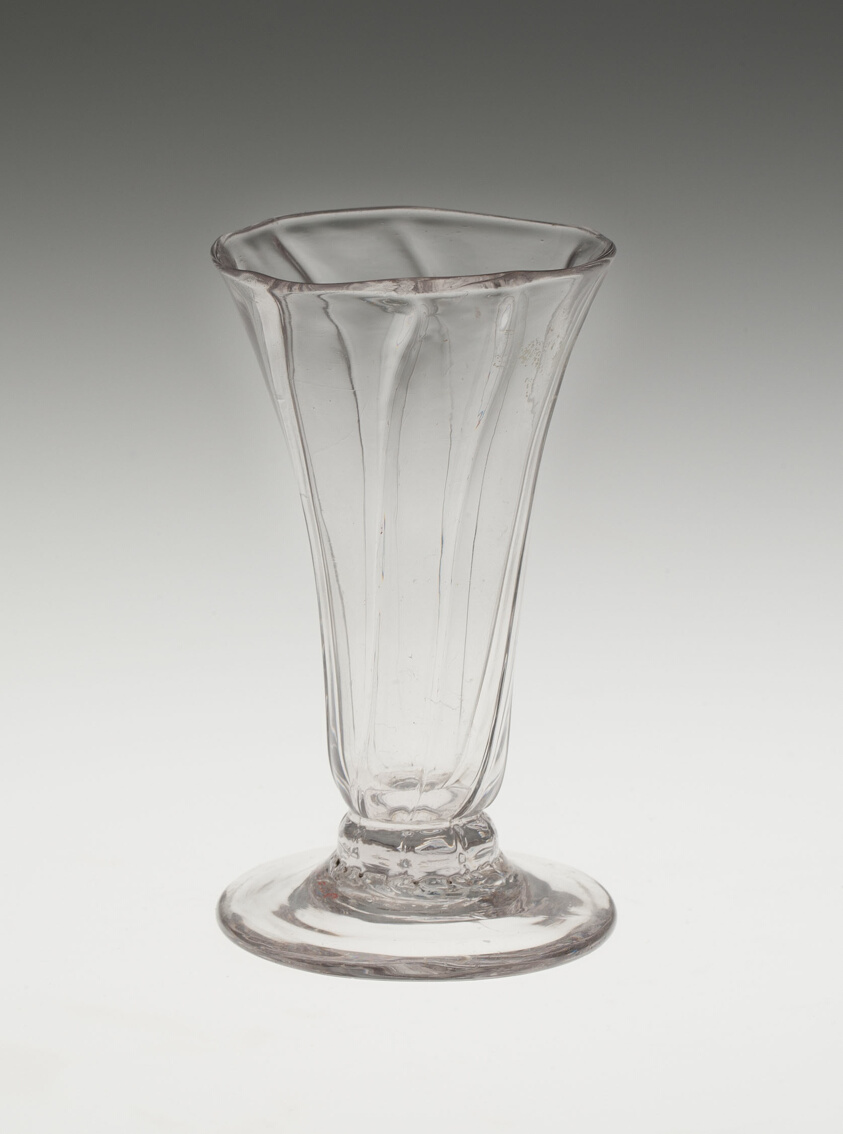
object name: Glass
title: Jelly Glass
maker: England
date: 1750/75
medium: Glass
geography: England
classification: drinking vessel; glass; european decorative arts